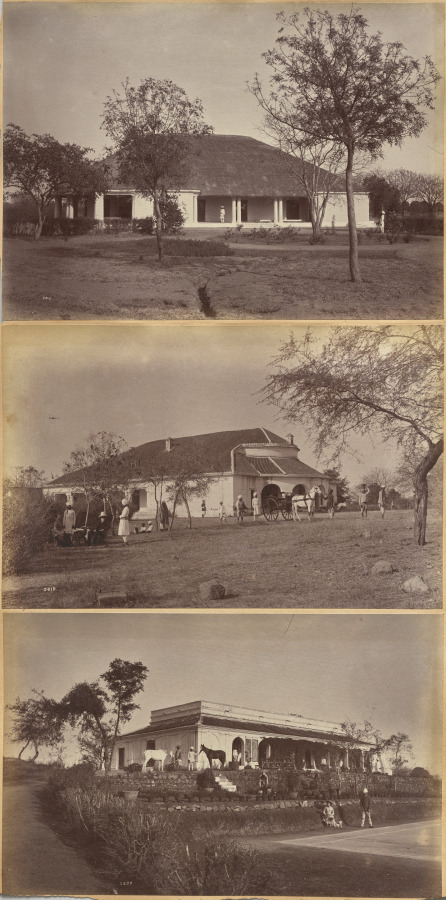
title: Commissioner's house, Jhansi (recto); Reverend Holcomb's Bungalow (verso, top); Untitled (verso, bottom)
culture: India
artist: Raja Deen Dayal (Indian, 1844–1905)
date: c. 1882–87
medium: albumen print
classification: Photograph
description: These photographs are part of an album, now disassembled, of around 105 photographs taken in India between 1885 and summer 1887 that provide glimpses into the lives of the British colonial elite and royal and upper-class Indians. The museum holds another group of 37 pictures from this album (2016.266), which was probably commissioned by a British civil servant visiting or working in India around 1888 as a personal souvenir of his experiences there.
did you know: Raja Deen Dayal is regarded now, and was considered during his lifetime, to be India’s most important 19th-century photographer.